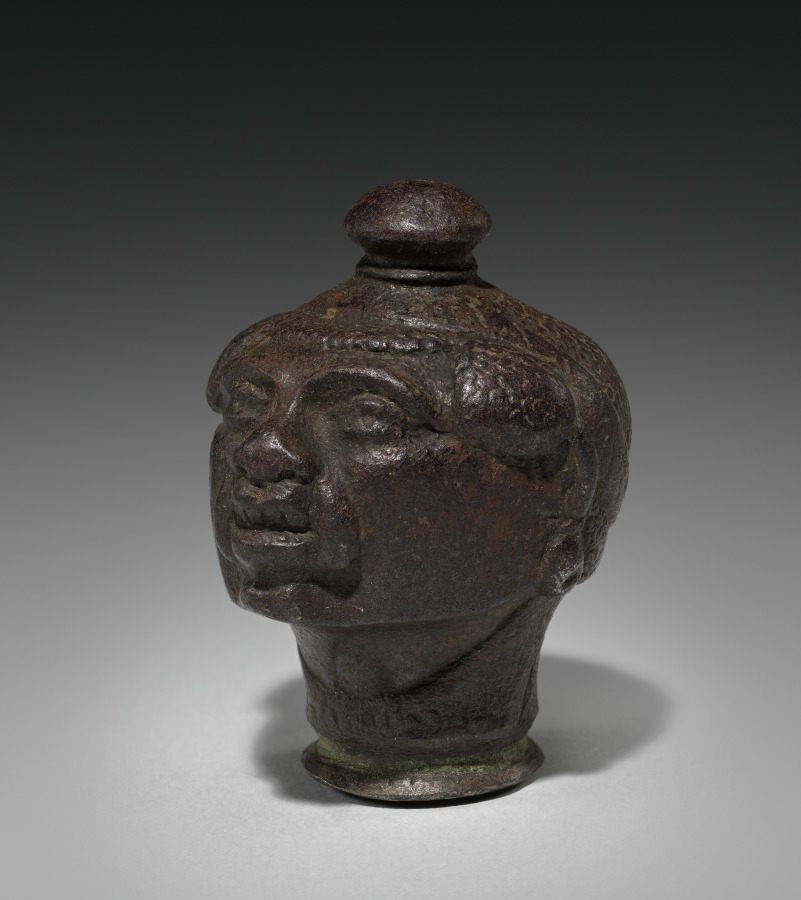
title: Pommel of Sword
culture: Italy, 17th century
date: 1600s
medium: steel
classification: Arms and Armor